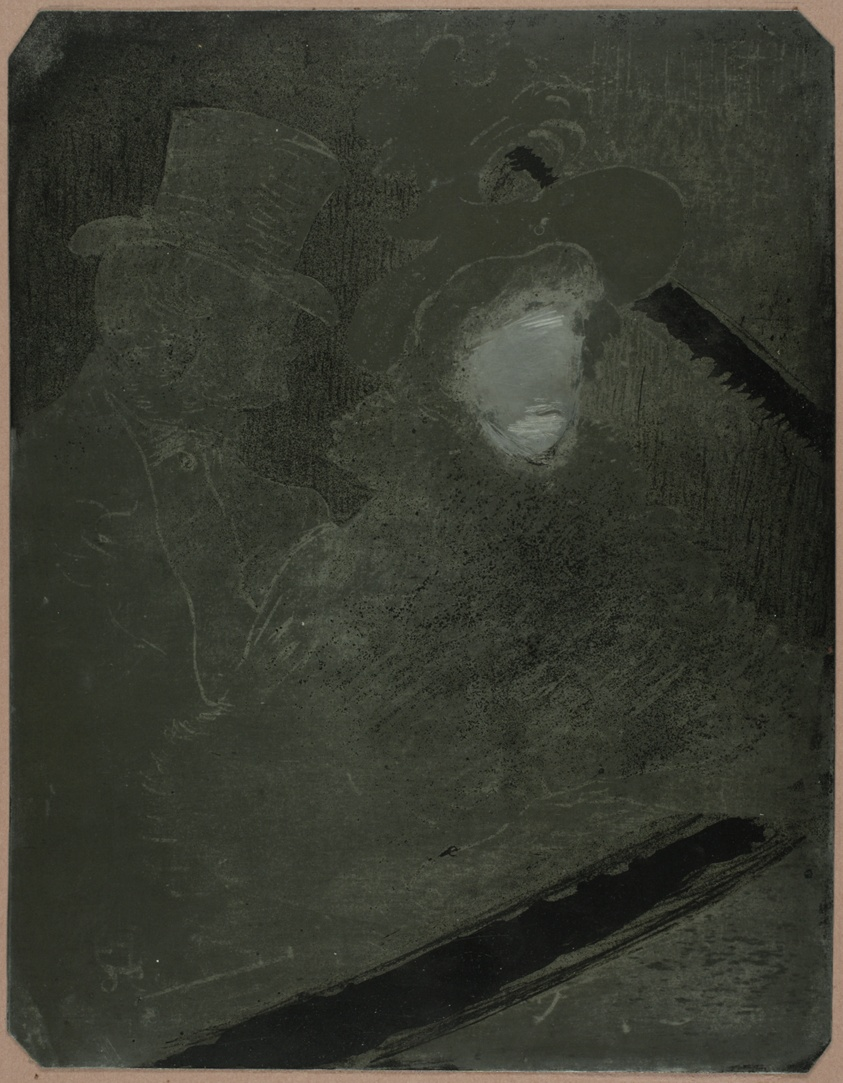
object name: Print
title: At the Concert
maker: Henri de Toulouse-Lautrec (French, 1864-1901)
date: 1896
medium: Zinc lithographic plate with corners removed and beveled edges, laid down on mauve board and taped to mat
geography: France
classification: zincograph; matrix; prints and drawing; print